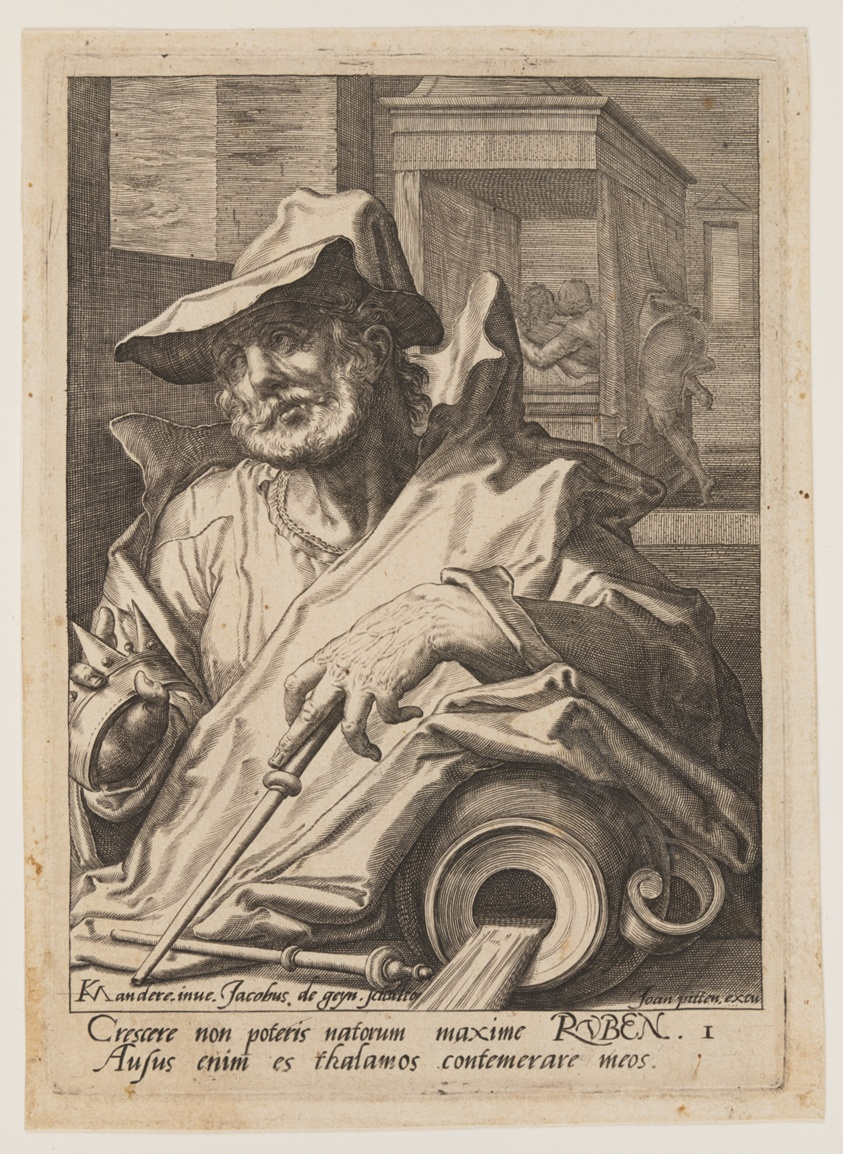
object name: Print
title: Ruben, from The Twelve Sons of Jacob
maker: Jacques de Gheyn II (Dutch, 1565–1629); after Karel van Mander (Dutch, 1548–1606)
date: c. 1589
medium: Engraving on ivory laid paper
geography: Netherlands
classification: engraving; paper; print; prints and drawing